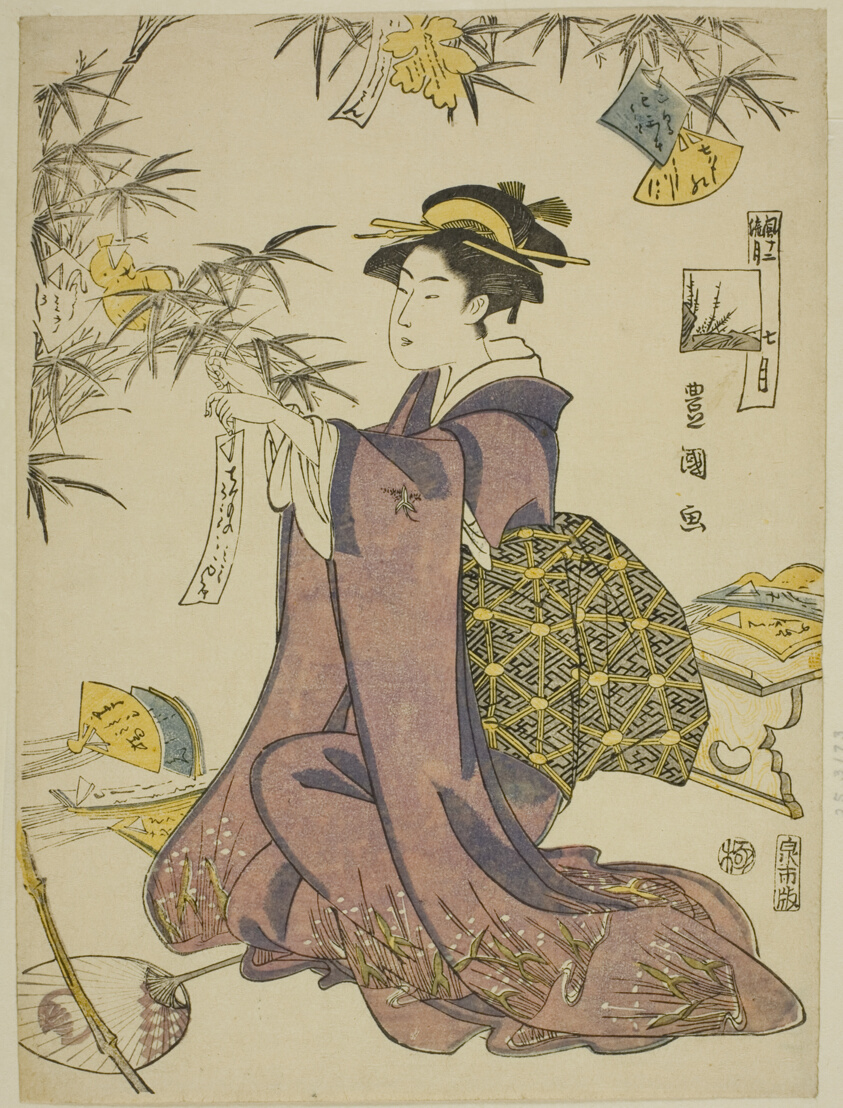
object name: Print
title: The Seventh Month (Shichi gatsu), from the series "Fashionable Twelve Months (Furyu junikagetsu)"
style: Japanese (culture or style)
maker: Utagawa Toyokuni I 初代 歌川 豊国; Japanese, 1769–1825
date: c. 1793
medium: Color woodblock print; chuban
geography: Japan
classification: woodblock print; print; asian art